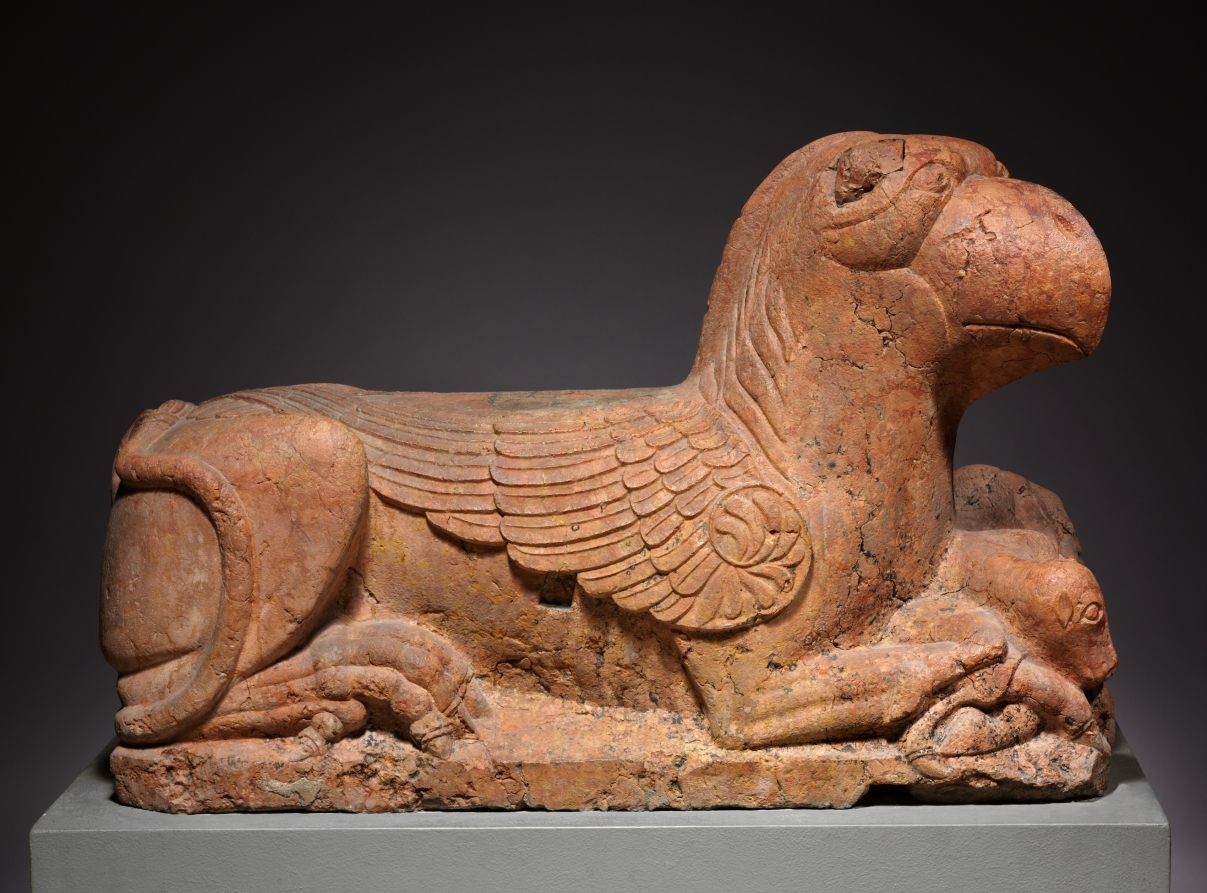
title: Guardian Griffin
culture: Northern Italy, Emilia, 12th century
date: 1150–1175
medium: pink limestone (called "Verona Marble")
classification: Sculpture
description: Griffins are fabled creatures that have the characteristics of an eagle and a lion--combining watchfulness and courage. In Christian art, the dual nature of the griffin was often used to signify that of Christ himself: divine (bird) and human (animal). Griffins were often used as guardian figures in church sculpture and were placed in portals and choir screens. The creatures seen here, with their inward-turning heads, were certainly used for such a purpose. When viewed from the front, one griffin may be seen protecting the figure of a knight between its paws, while the other griffin guards a calf. Their original function was probably to support the columns of a porch in front of a church doorway.